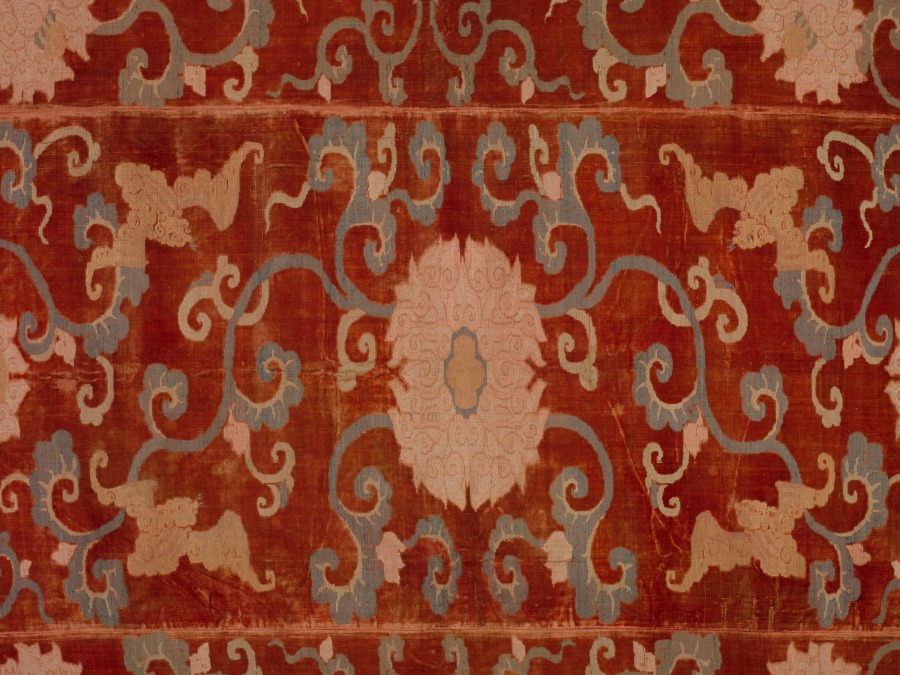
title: Velvet Brocade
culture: China, Qing dynasty (1644–1911), Qianlong reign (1736–95)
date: 1700s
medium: velvet brocade, gold thread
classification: Velvet